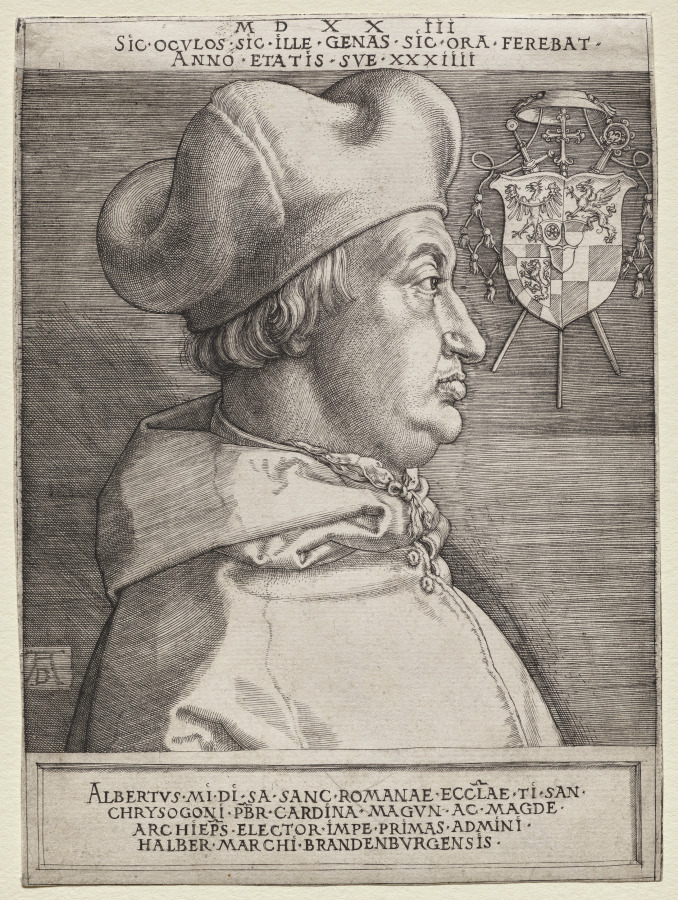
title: Cardinal Albrecht of Brandenburg - the Large Plate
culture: Germany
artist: Albrecht Dürer (German, 1471–1528)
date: 1523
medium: engraving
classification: Print